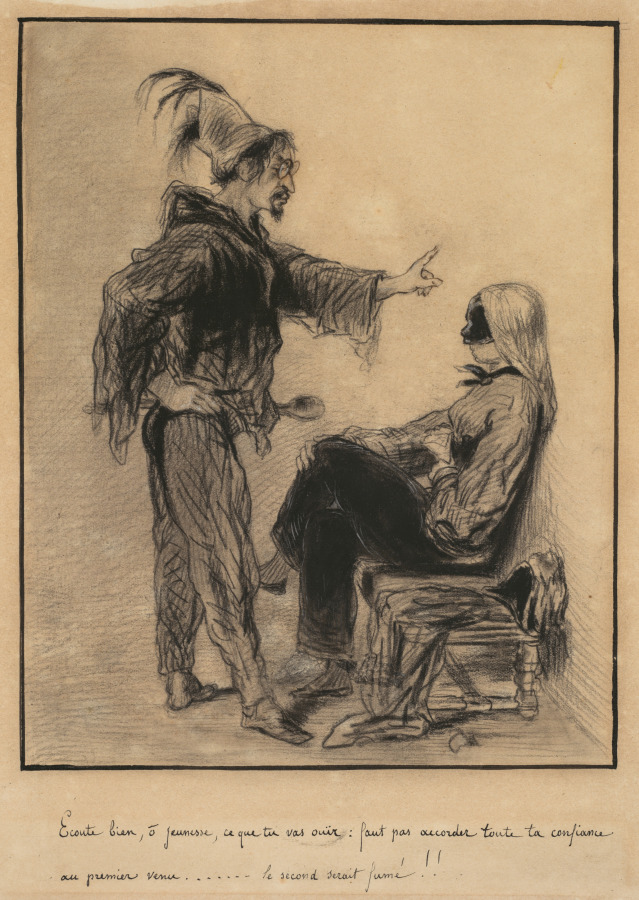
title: Study for a Scene from "Carnaval"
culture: France, 19th century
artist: Paul Gavarni (French, 1804–1866)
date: c. 1847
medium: black chalk with touches of white gouache; border in black ink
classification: Drawing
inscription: Lower margin, in black ink: Ecoute bien, ô jeunesse, ce que tu vas ouïr: faut pas accorder toute ta confiance / au premier venue . . . . . . . le second serait fume ! ! Verso, upper left, in graphite: 16 in a circle